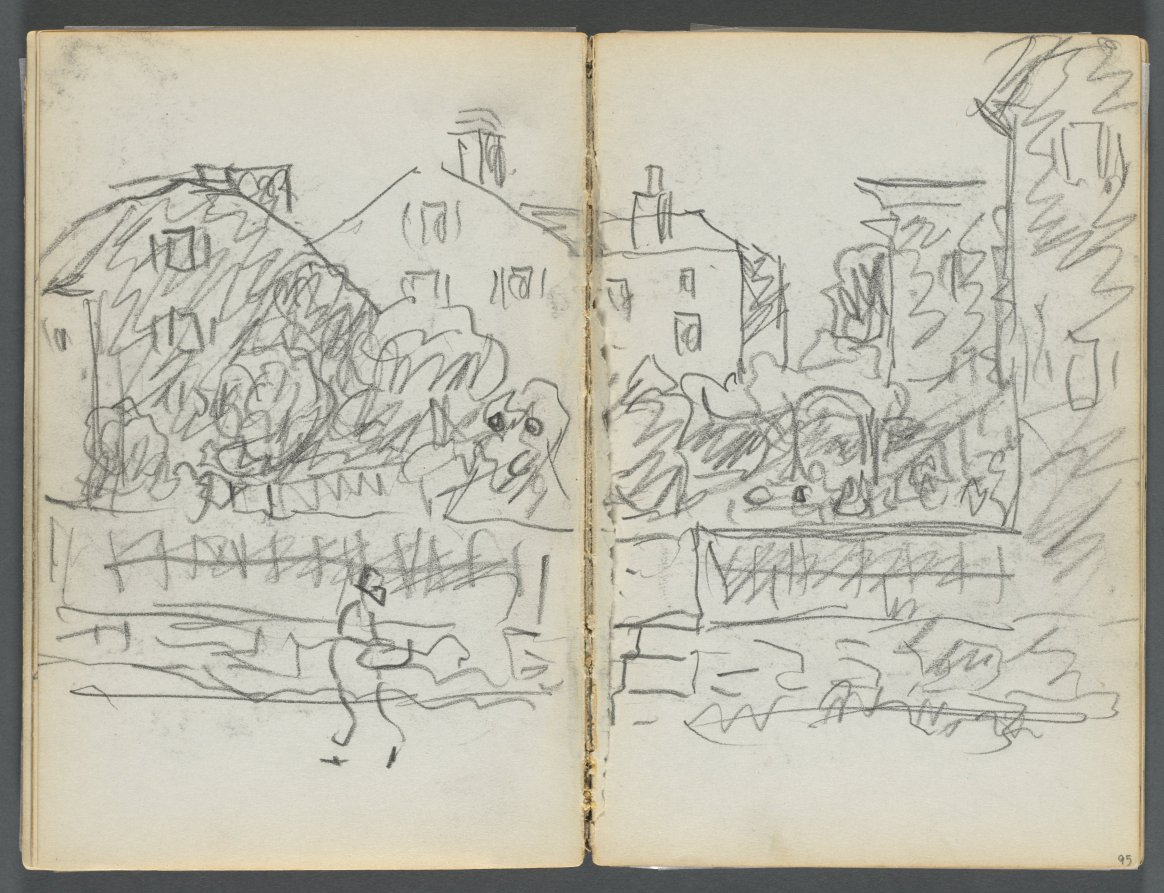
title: Sketchbook, The Dells, N° 127, page 094 & 95: Village Street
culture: America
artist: Maurice Prendergast (American, born Newfoundland [now Canada], 1858–1924)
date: c. 1919–1921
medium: graphite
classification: Bound Volume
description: This sketchbook contains 59 pages of graphite drawings and 16 watercolors made at various locations on Cape Ann, Massachusetts.